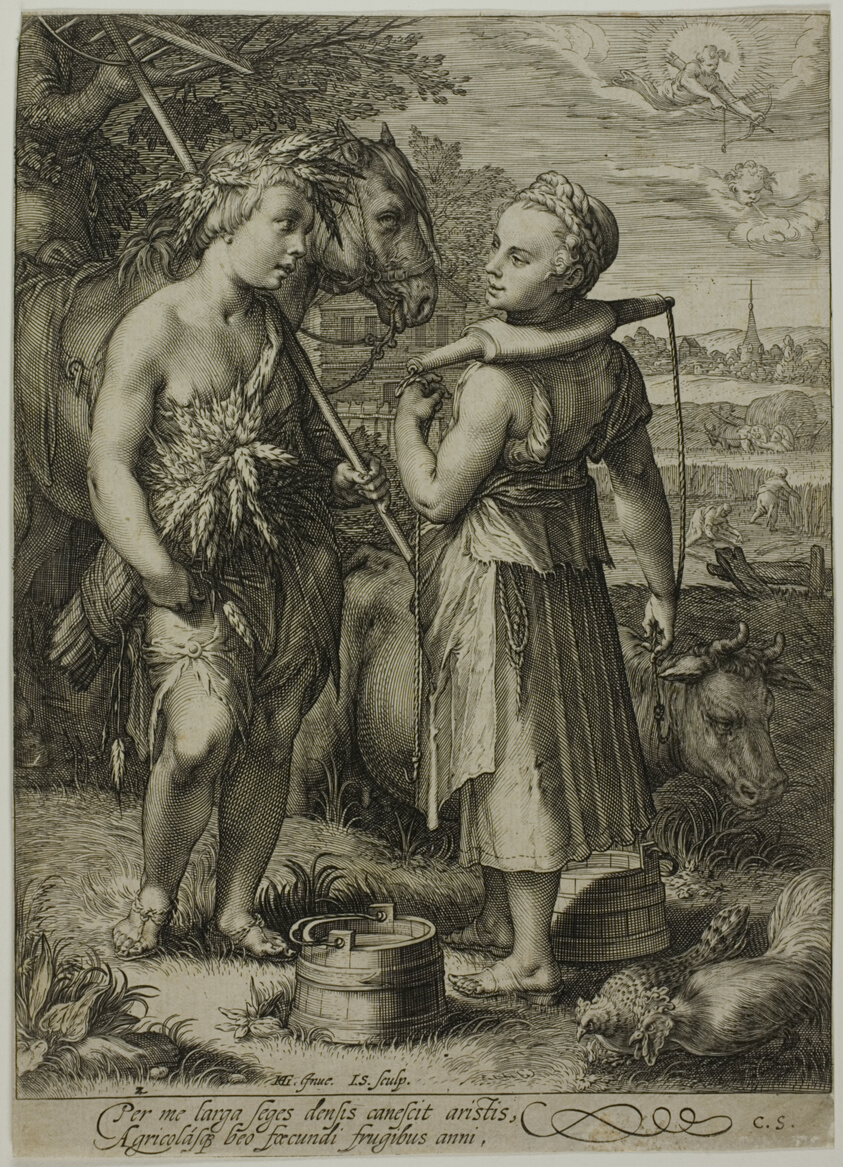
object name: Print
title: Summer, from The Four Seasons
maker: Jan Saenredam (Dutch, 1565-1607)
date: 1601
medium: Engraving on cream laid paper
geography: Netherlands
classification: engraving; print; prints and drawing